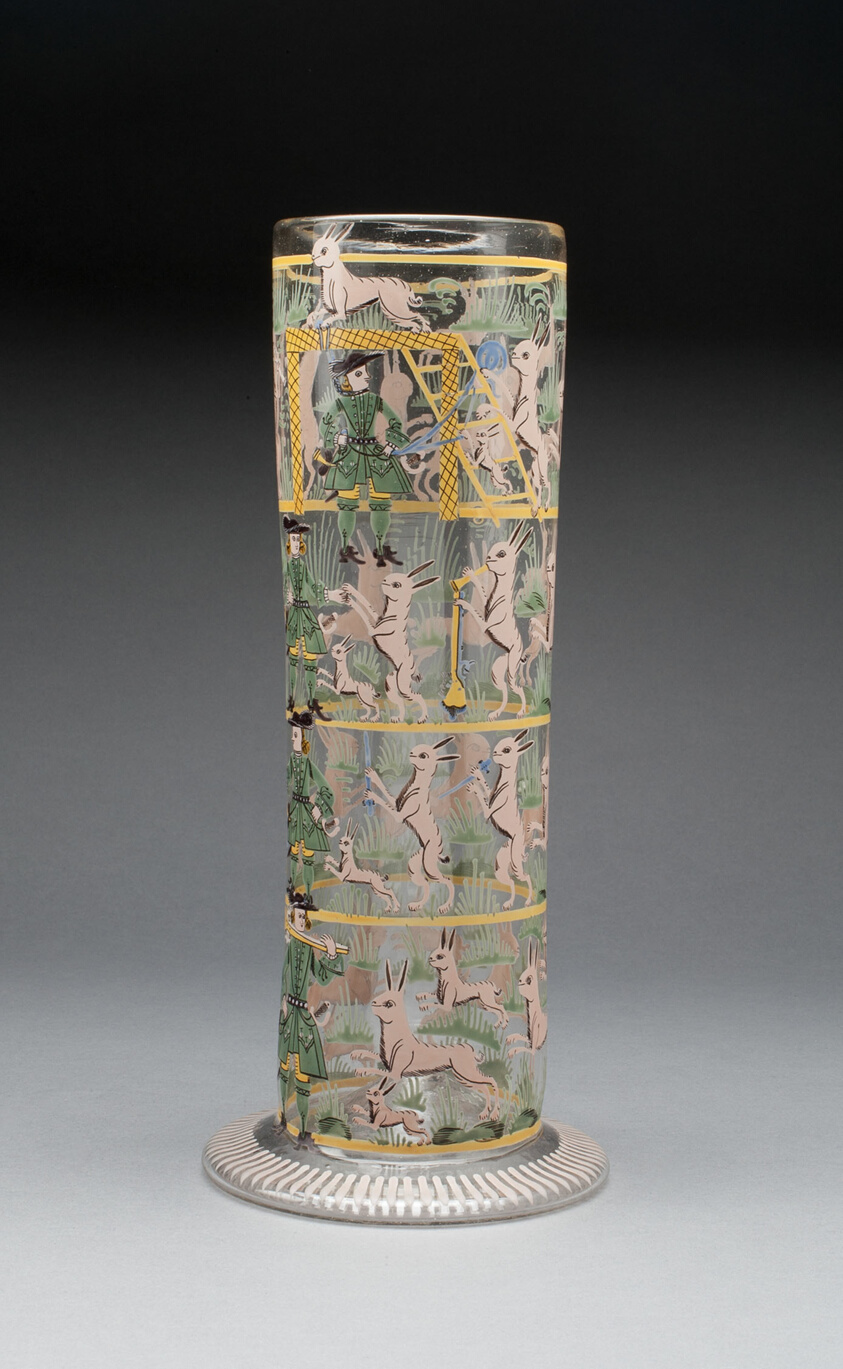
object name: Glass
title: Beaker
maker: Germany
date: 1650/1700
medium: Glass with polychrome enamels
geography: Germany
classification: drinking vessel; glass; european decorative arts